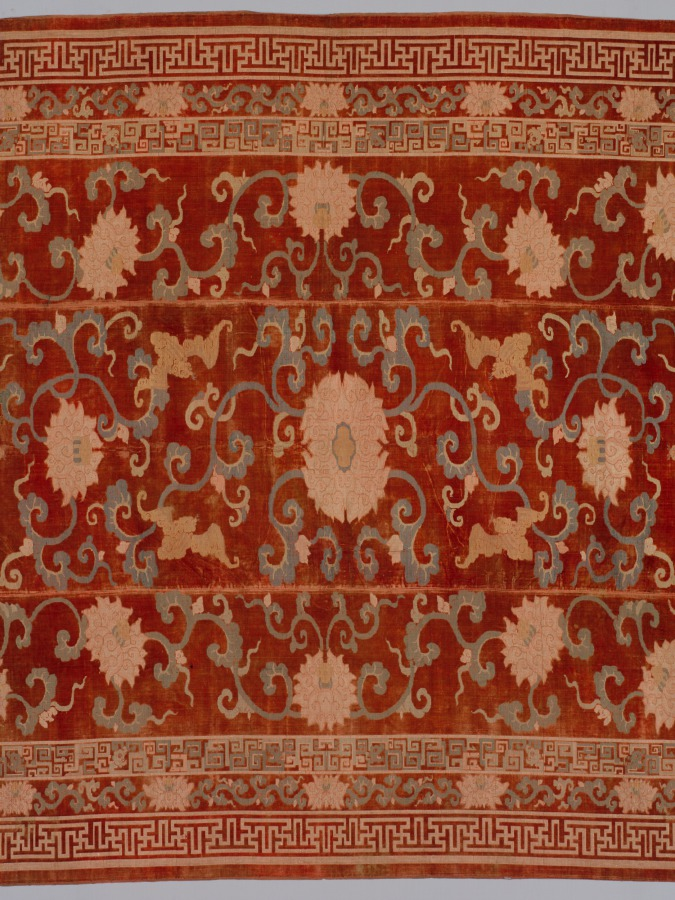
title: Velvet Brocade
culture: China, Qing dynasty (1644–1911), Qianlong reign (1736–95)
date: 1700s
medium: velvet brocade, gold thread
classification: Velvet